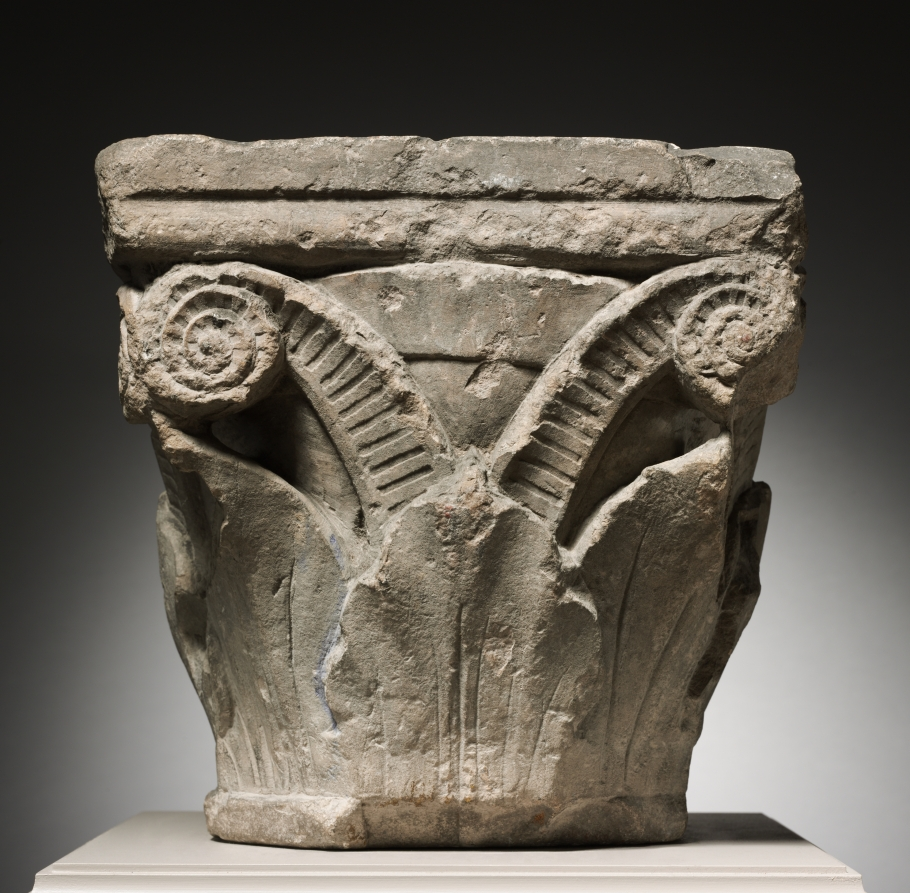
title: Capital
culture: Italy, Migration period, 8th-9th Century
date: 700s-800s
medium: marble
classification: Sculpture